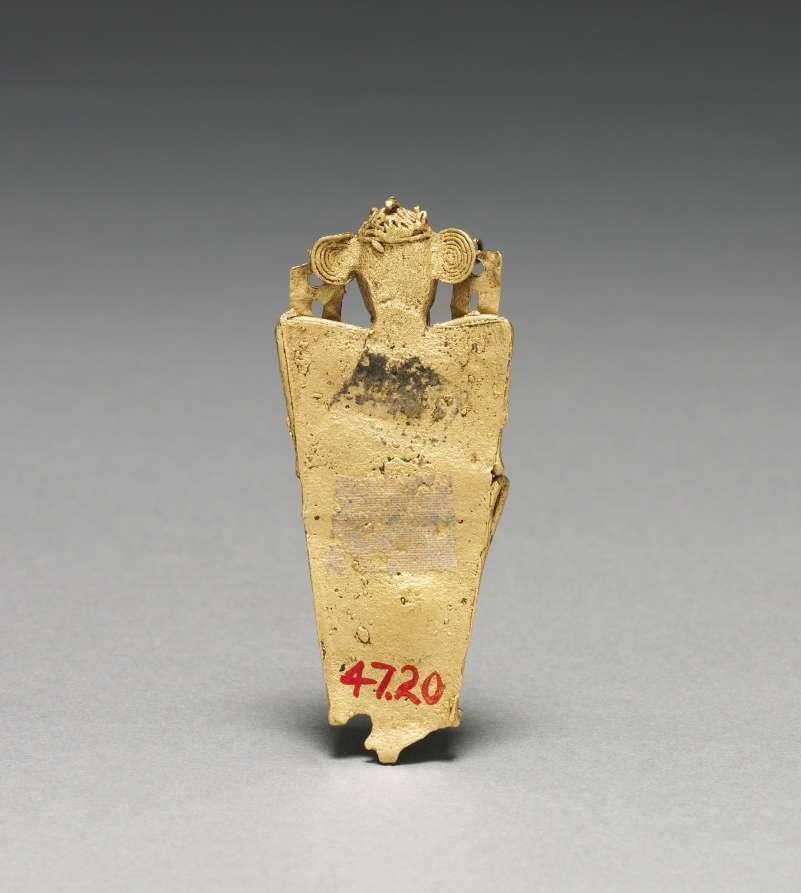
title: Tunjos (Votive Offering Figurine)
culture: Colombia, Muisca style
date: c. 900–1550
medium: cast gold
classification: Metalwork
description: Unlike the other gold ornaments made in the isthmian region, tunjos were not worn; instead, they served as offerings that were deposited in sacred places such as lagoons and caves. They often depict humans who hold something. Perhaps because they were not meant for display, tunjos were not finished after lost-wax casting. Flaws remain uncorrected, surfaces are unpolished, and gold that backed into the channel used to pour the molten metal into the mold was left in place.